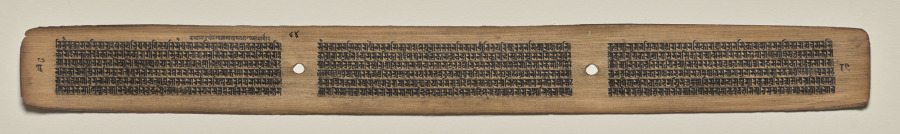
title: Text, Folio 84 (verso), from a Manuscript of the Perfection of Wisdom in Eight Thousand Lines (Ashtasahasrika Prajnaparamita-sutra)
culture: Eastern India, Bihar, Vikramashila Monastery. Painting: Nepal, Kathmandu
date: Sunday, September 14, 1119 (year 239 of the Newar Samvat in the month of Ashvina)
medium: gum tempera and ink on palm leaves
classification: Painting